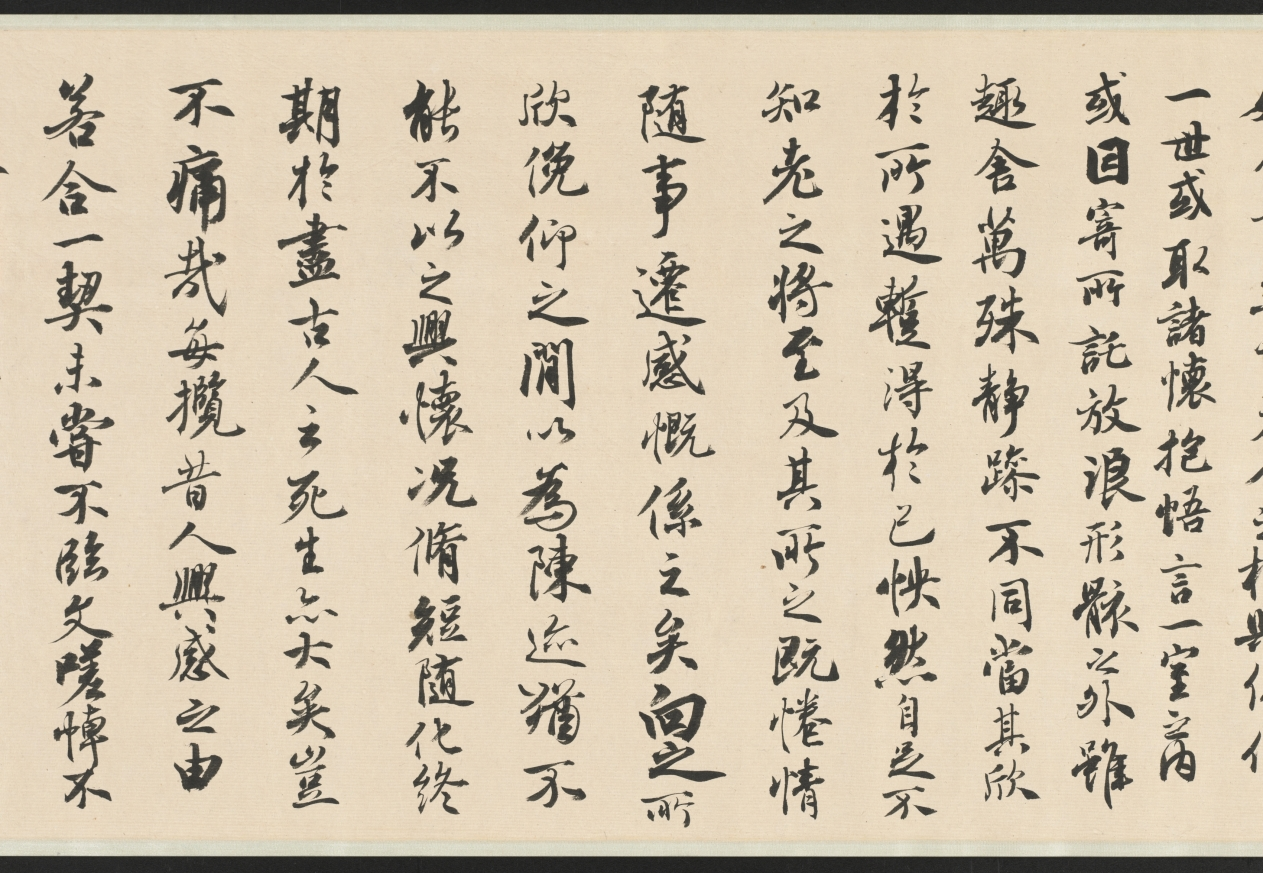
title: Purification at the Orchid Pavilion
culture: China, Qing dynasty (1644-1911)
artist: Fan Yi (Chinese, c. 1615–before 1688)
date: 1671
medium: Handscroll; ink and color on silk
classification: Painting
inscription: Artist's inscription, signature, and 2 seals: Painted by Fan Yi of Zhongfu during the second month of winter of the xinhai year [1671]. [2 seals] Fan Yi zhi yin, Zi yu yi.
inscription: Title on the frontispiece by Monk Yueshan (1629-1709).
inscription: 3 colophons and 13 additional seals: 1 colophon, dated 1707, and 6 seals of Yueshan; 2 colophons and 3 seals of Wong Kwan-Shut (Huang Junshi) 黃君實 (b. 1934); 2 seals of Fu Shen 傅 申 (b. 1937); 2 seals of Tessai Tomioka 富岡鐵齋 (1836-1924).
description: By the 1600s, the historic gathering at Lanting, Zhejiang province, in 353 CE was a common theme in Chinese painting. Originally based on a composition attributed to Li Gonglin (1049– 1106), now lost, Wu school artists revived the theme. Fan Yi, the brother of the artist Fan Qi from Nanjing, used delicate brushwork and luminous colors to depict the spring gathering.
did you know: The gathering’s host is in the Orchid Pavilion at the end of the scroll, representing an episode known as “Wang Xizhi Watching the Geese 王羲之觀鵝圖.”